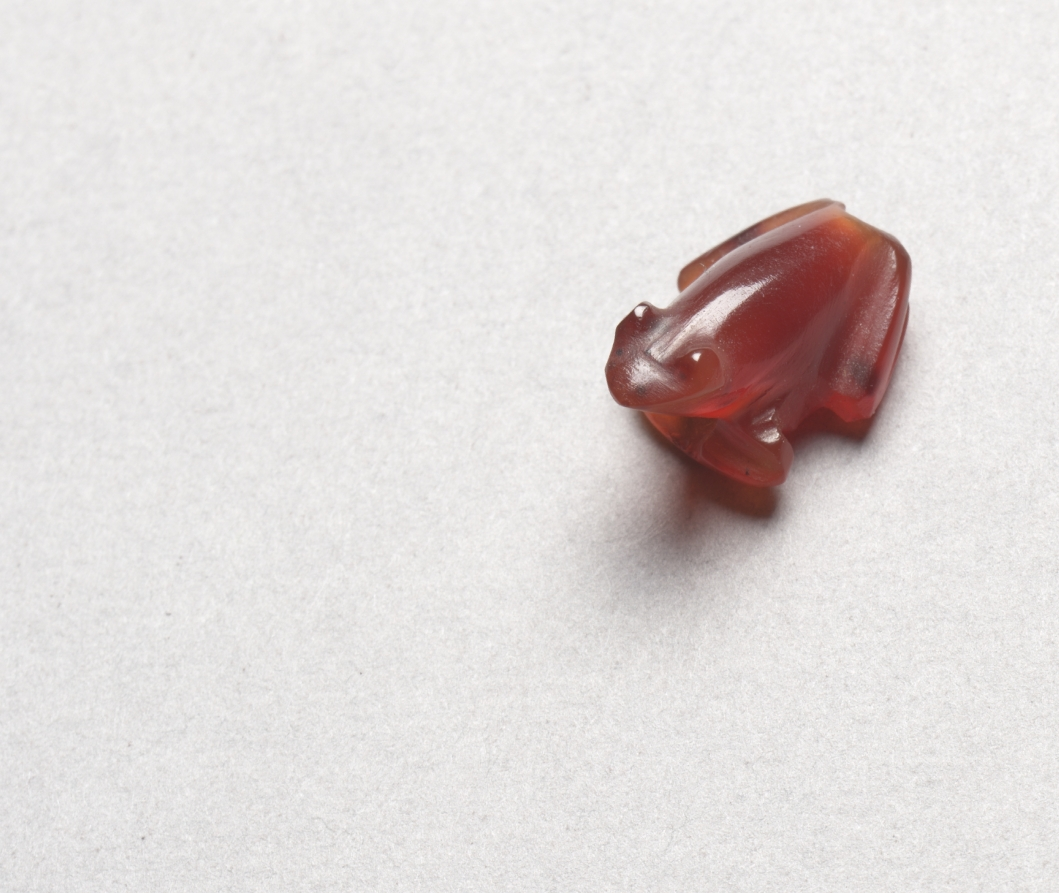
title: Frog Amulet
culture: Egypt, New Kingdom (1540–1069 BCE), Dynasty 18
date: c. 1540–1296 BCE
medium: carnelian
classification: Amulets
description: The frog, because of its numerous offspring, was a symbol of fertility. In fact, the hieroglyphic sign for 100,000 was a tadpole. Frog amulets were very popular both in semiprecious stone and in faience, and were worn by women hoping for an easy delivery. Both sexes wore the frog in expectation of a successful rebirth in the afterlife.